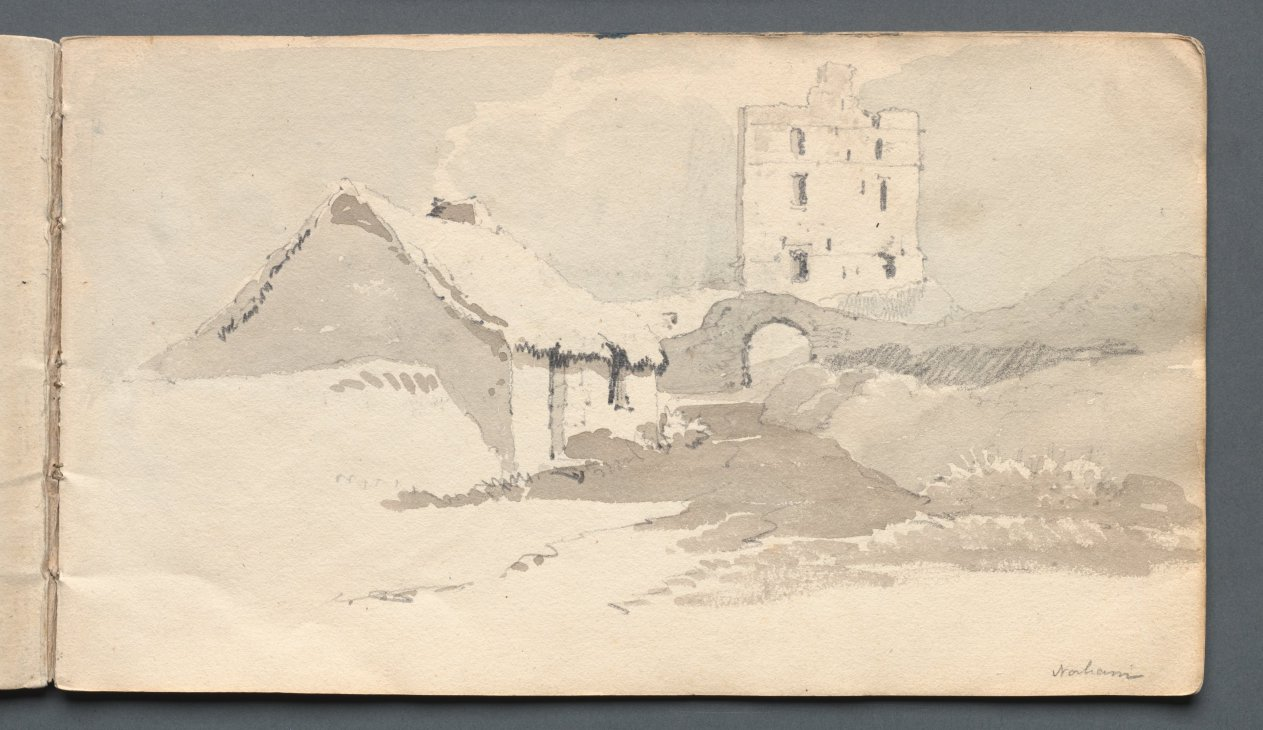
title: Sketchbook: Norham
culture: England, 19th century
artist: Samuel Prout (British, 1783–1852)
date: 1814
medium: graphite with gray and brown wash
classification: Bound Volume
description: John Ruskin (also in this gallery) admired Prout’s strength as a draftsman. Like the topographical watercolorists of the 18th century, Prout emphasized form over color in his watercolors, as is evident in the monochromatic, delicate English views in this sketchbook.